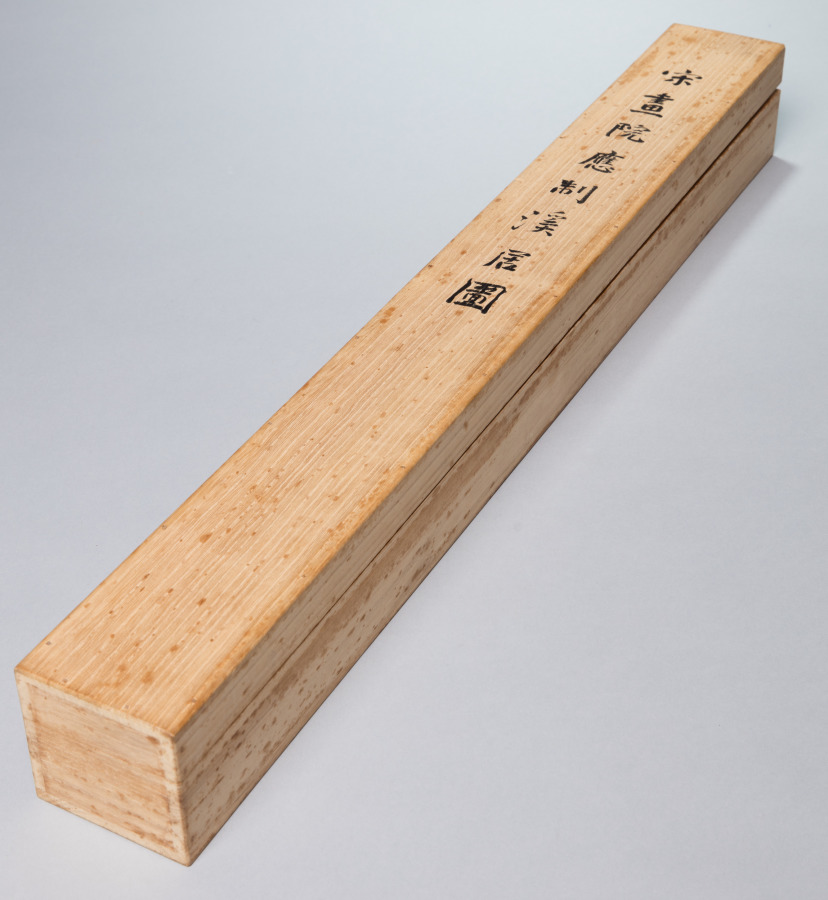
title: Mountain Market, Clear with Rising Mist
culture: Korea, Joseon dynasty (1392–1910)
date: early 1500s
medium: Hanging scroll; ink on silk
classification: Painting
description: This painting depicts several vignettes of the scholar-hermit’s various activities. In the lower left corner, the scholar-hermit is portrayed welcoming his guest in the courtyard. In the middle section on the lower bottom, the scholar and his guest are shown encountering another traveler on the bridge and exchanging their greetings. After crossing the bridge, the scholar visits a friend who lives in a compound of multiple buildings. The two friends decide to take a short walk. Both appear in a terraced cliff, enjoying a mountain vista and the fragrance of an old pine tree carried by the gentle wind. The scholar continues his journey with his two servants. They are portrayed crossing a winding wooden bridge. Right beyond the colossal rocky mountain, a panoramic view to a bustling market place unfolds, suggesting that it may be the place where the scholar-hermit’s entourage would visit. Perhaps the scholar need to buy items such as books, rolls of papers, and brushes, all essential to scholarly life. Toward the upper left corner, another group of travelers is landing on the river bank that leads to the city gate; they may be headed to the multistoried Buddhist stupa nestled on the top of the mountains.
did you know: Due to its stylistic features, this painting has long been believed to be a Chinese painting of the Northern Song period, dated to the 12th century.